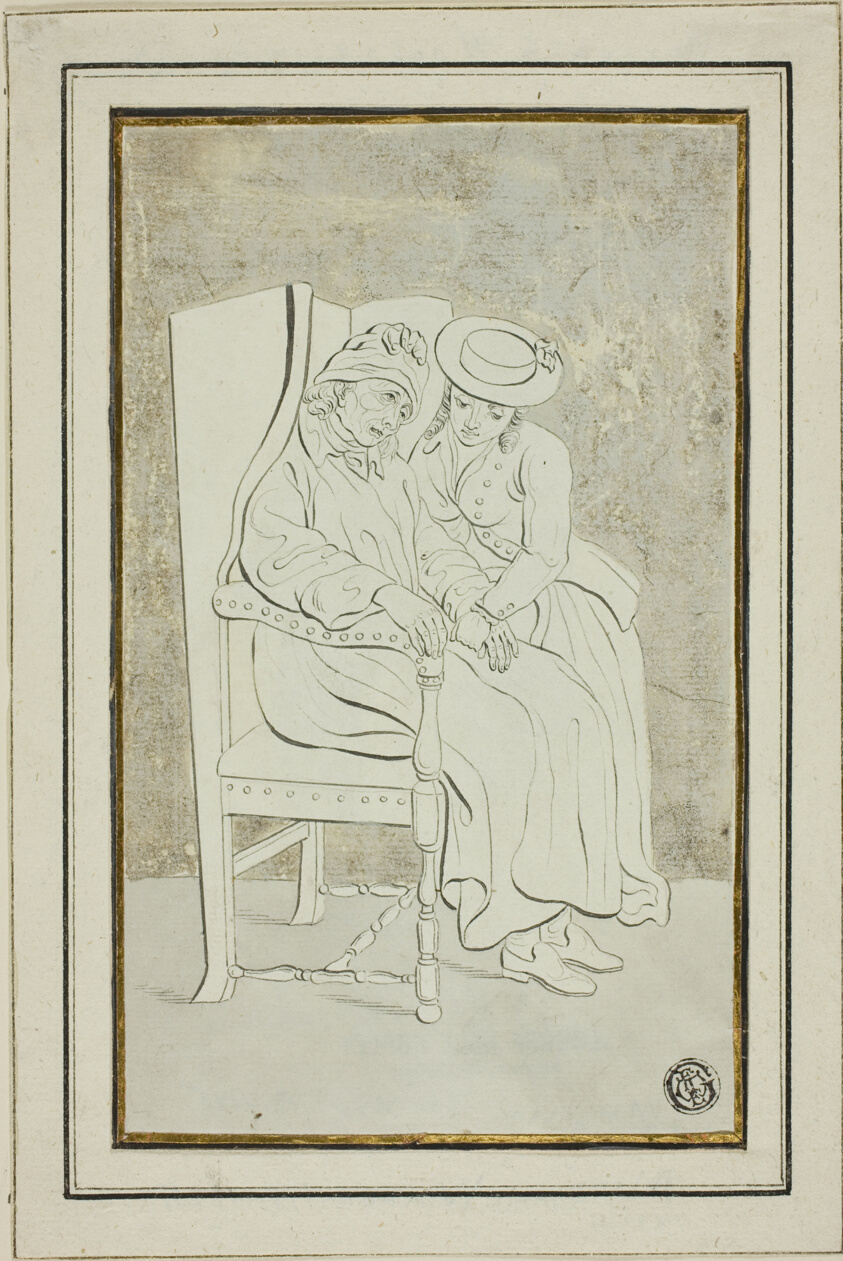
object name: Drawing and Watercolor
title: Old Man with Young Woman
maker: Marquand Fidel Dominikus Wocher (Swiss, 1760-1830)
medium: Pen and black ink, with brush and gray gouache, on cream laid paper, tipped on ivory laid paper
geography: Switzerland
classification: pen and ink drawings; drawings (visual works); prints and drawing